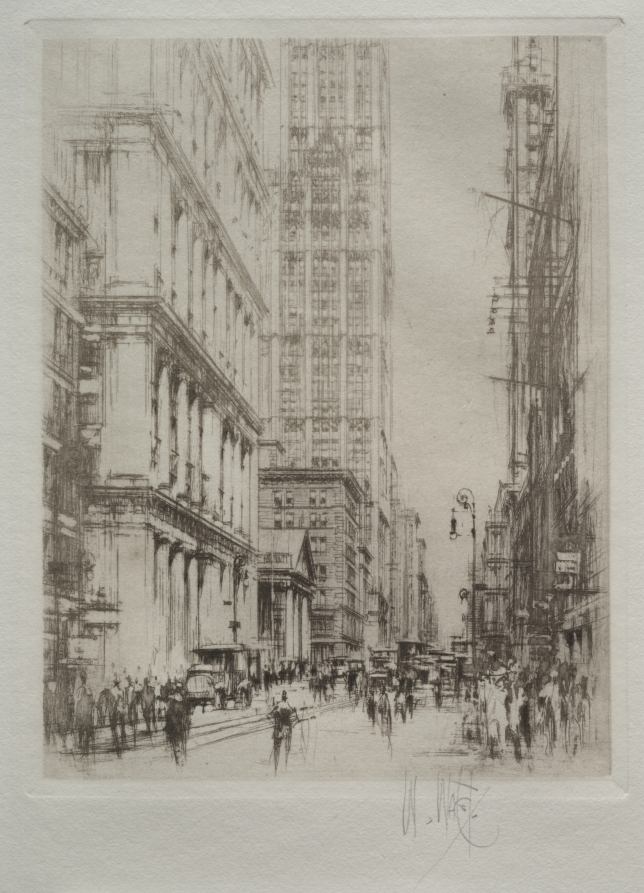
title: Lower Broadway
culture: England, 20th century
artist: William Walcot (British, 1874–1943)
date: 1923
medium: drypoint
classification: Print